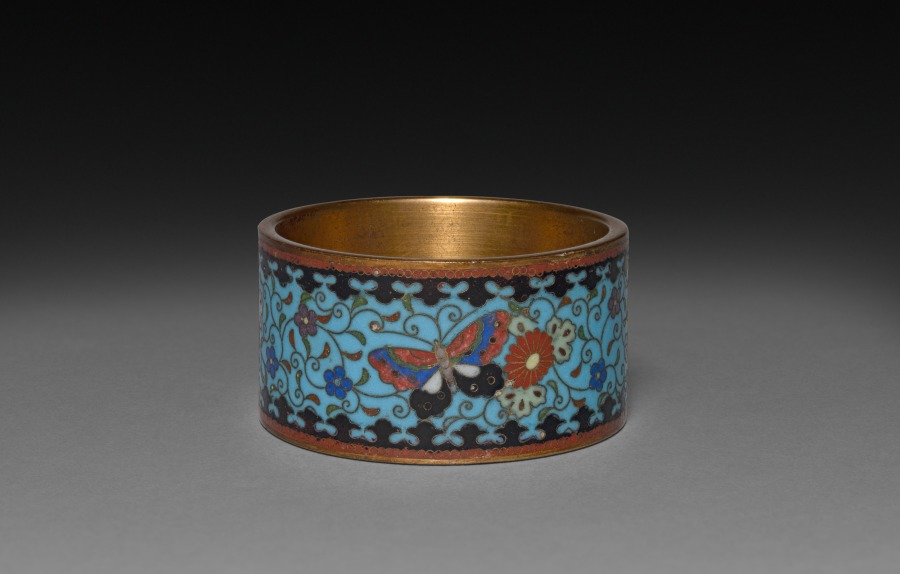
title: Napkin Ring with Butterflies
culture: Japan, Meiji period (1868–1912) or Taishō period (1912–26)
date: early 1900s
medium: cloisonne enamel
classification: Enamel